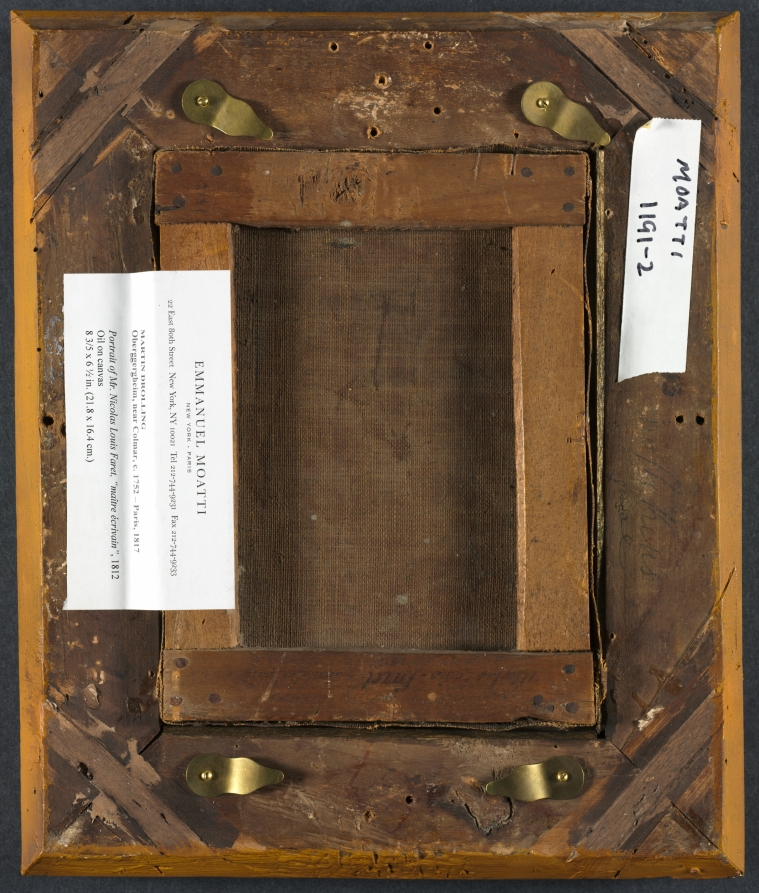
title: Nicolas Louis Faret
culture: France, 19th century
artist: Martin Drölling (French, 1752–1817)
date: 1812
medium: oil on canvas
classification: Painting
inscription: "Drollin(g)" ("g" obscured by frame) and "1812" in black paint, lower right Signed, dated, and inscribed with the sitter's name on the back of the stretcher